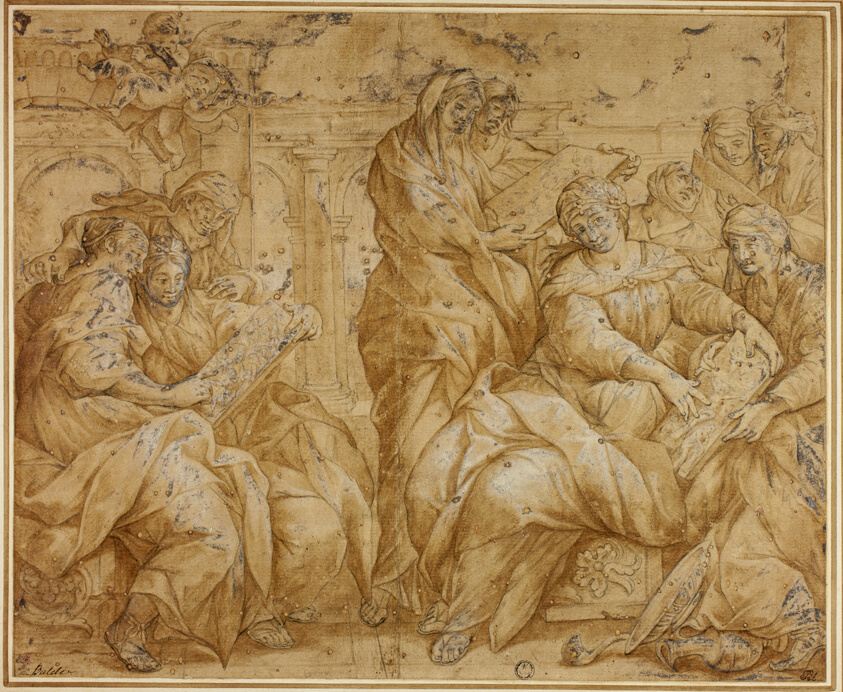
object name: Drawing and Watercolor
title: Women Looking at Religious Tablets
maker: after Lazzaro Baldi; Italian, c. 1624-1703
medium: Black chalk with brush and brown wash, heightened with lead white (discolored), on tan laid paper, laid down on ivory laid paper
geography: Italy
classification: ink or chalk wash; drawings (visual works); prints and drawing